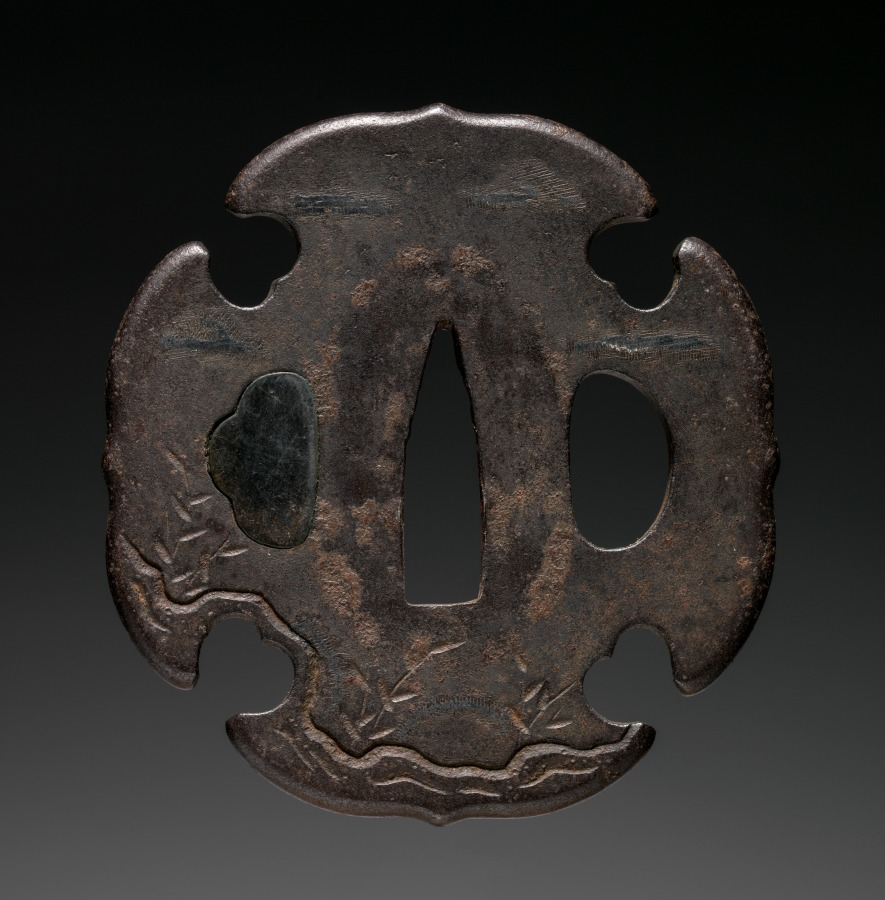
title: Sword Guard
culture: Japan, Edo period (1615–1868)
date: early 1800s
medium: iron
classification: Arms and Armor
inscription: Signature: Shoami Kanenobu